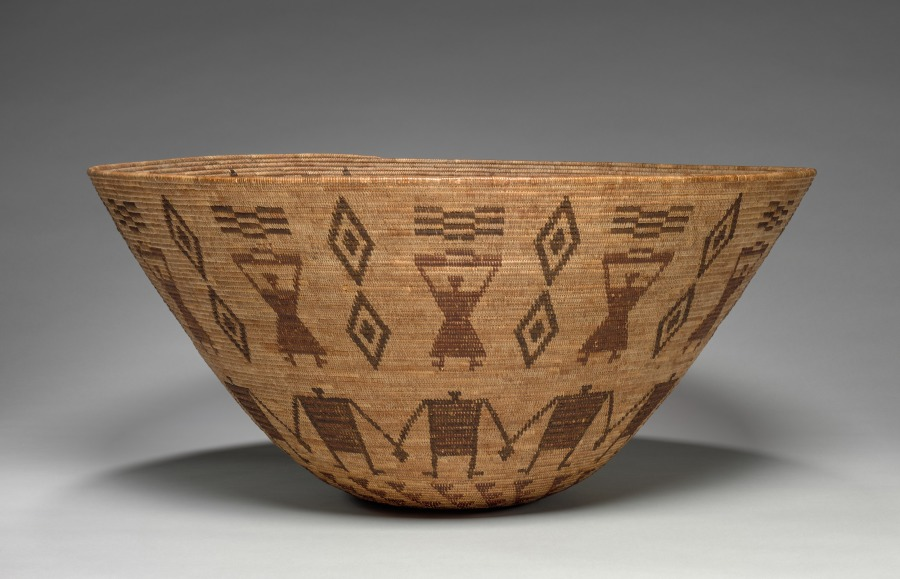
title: Presentation Bowl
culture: Native North America, California, Yokuts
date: 1900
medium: redbud, bracken fern; coiled, grass foundation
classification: Basketry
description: This fine bowl was created by a weaver of the Yokuts, who lived in California’s San Joaquin Valley to the west of Koso (Panamint) Shoshone territory. Shared design motifs indicate contact between the two areas. For instance, the humans who appear to be holding hands in one register on this basket also occur on a small Koso (Panamint) Shosone basket in the collection.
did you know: This fine bowl was created by a weaver of the Yokuts, who lived in California’s San Joaquin Valley.